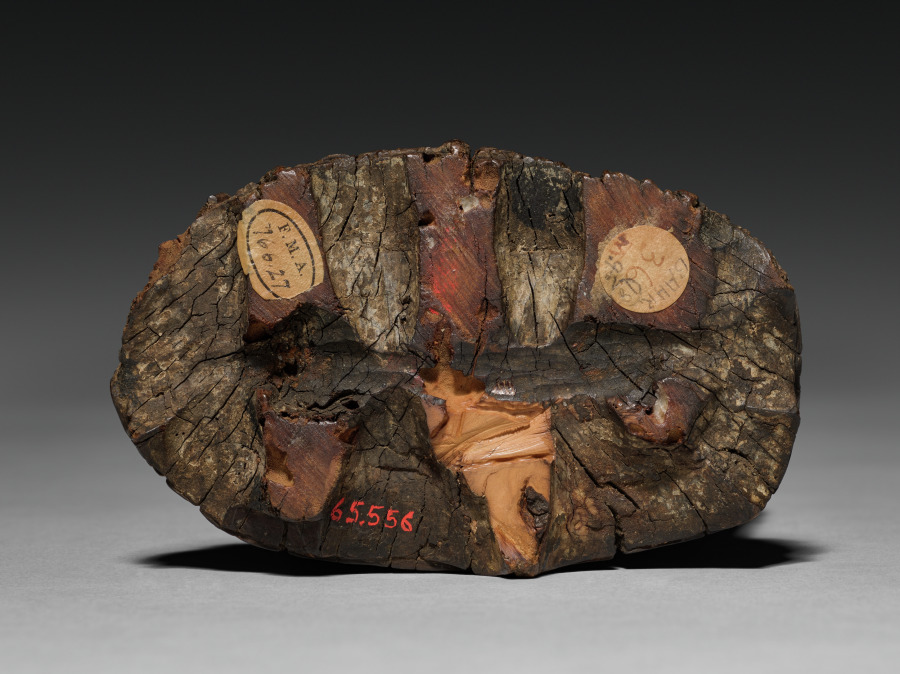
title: Potalaka Guanyin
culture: China, Five dynasties (907-960)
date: 900s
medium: Carved sandalwood with traces of paint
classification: Sculpture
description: This portable figure of Guanyin, the Bodhisattva of Compassion who vowed to stay on earth to help human beings, is carved of precious sandalwood. It is lavishly covered with garlands of flowers that retain traces of the original red paint. The small sculpture may have been used in a private devotional context.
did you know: Mount Potala is the mythical home of the bodhisattva Avalokiteśvara, called Guanyin in Chinese.